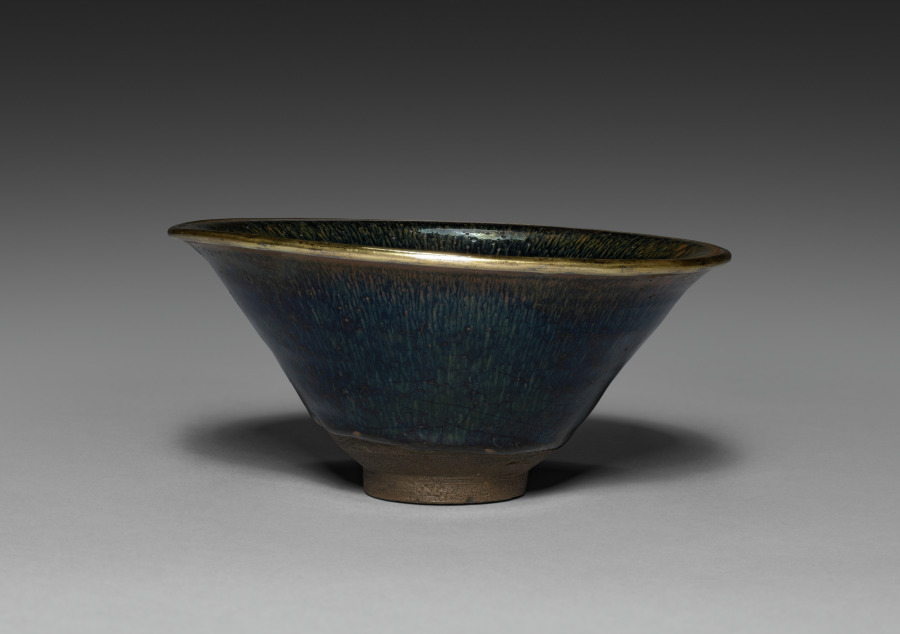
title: Tea Bowl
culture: China, Fujian province, Southern Song dynasty (1127-1279)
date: 1100s–1200s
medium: Stoneware with black “hare’s fur” glaze and metal-bound rim, Jian ware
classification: Ceramic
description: Due to its exceptional size, this Fujian tea bowl is rather rare. The enjoyment of Jian ware rests with the glaze transmutation due to iron in the glaze, which developed into reddish-brown streaks and spots against a rich black glaze after firing. Connoisseurs called these iron formations "hare’s fur" marks, and the ware was very popular with the tea cultures in China and Japan.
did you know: The reddish-brown streaks and spots have been affectionately termed "hare's fur" among connoisseurs.